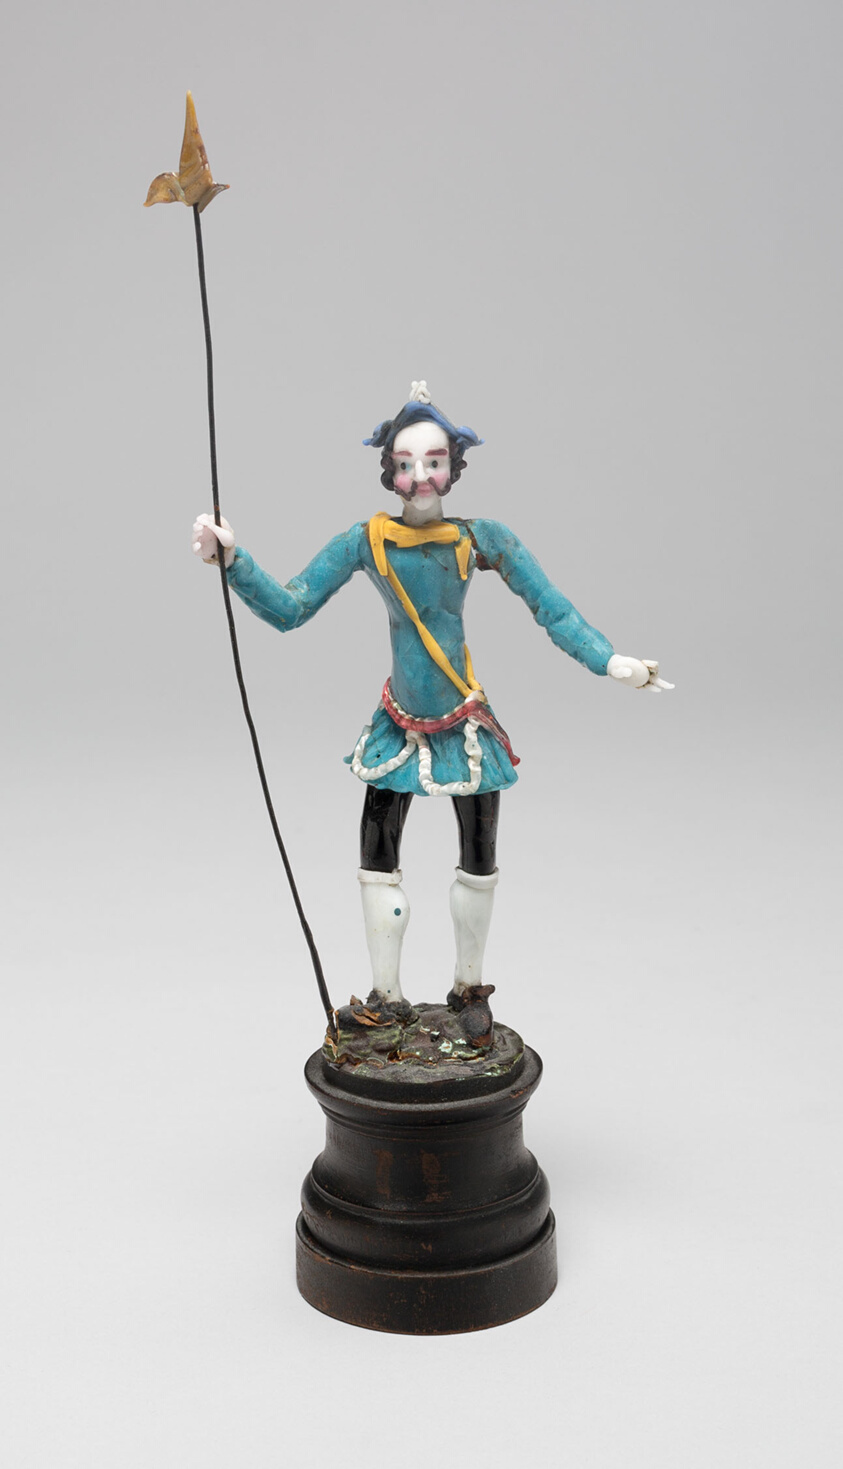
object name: Glass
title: Soldier with Lance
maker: Nevers, France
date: Late 17th to early 18th century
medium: Glass; lampwork (verre de Nevers), metal armature; wood pedestal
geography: France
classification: decorative object/ornament; lampwork; glass; european decorative arts